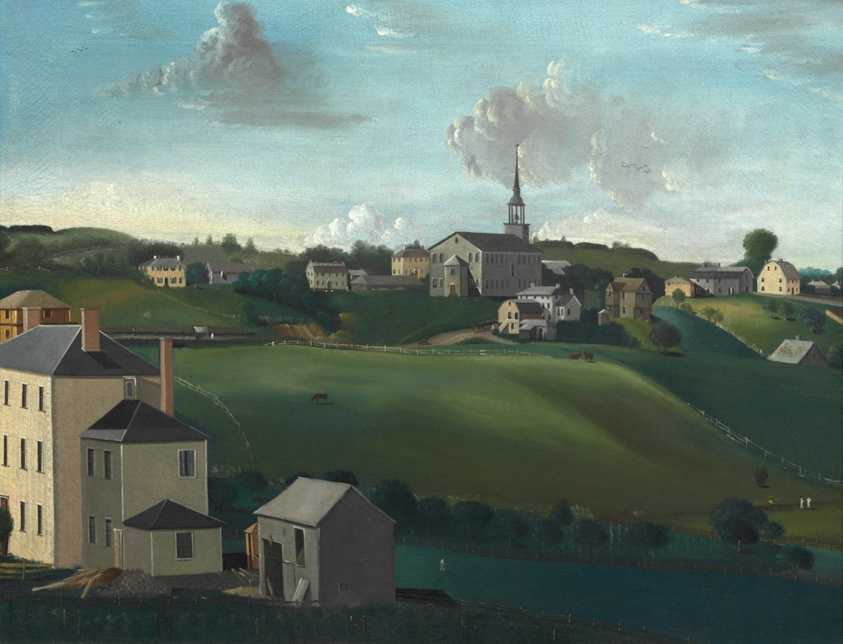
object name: Painting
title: Meetinghouse Hill, Roxbury, Massachusetts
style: Folk Art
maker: John Ritto Penniman (American, c. 1782–1841)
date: 1799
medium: Oil on canvas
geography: Roxbury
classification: painting; american arts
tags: landscapes, architecture, cityscapes